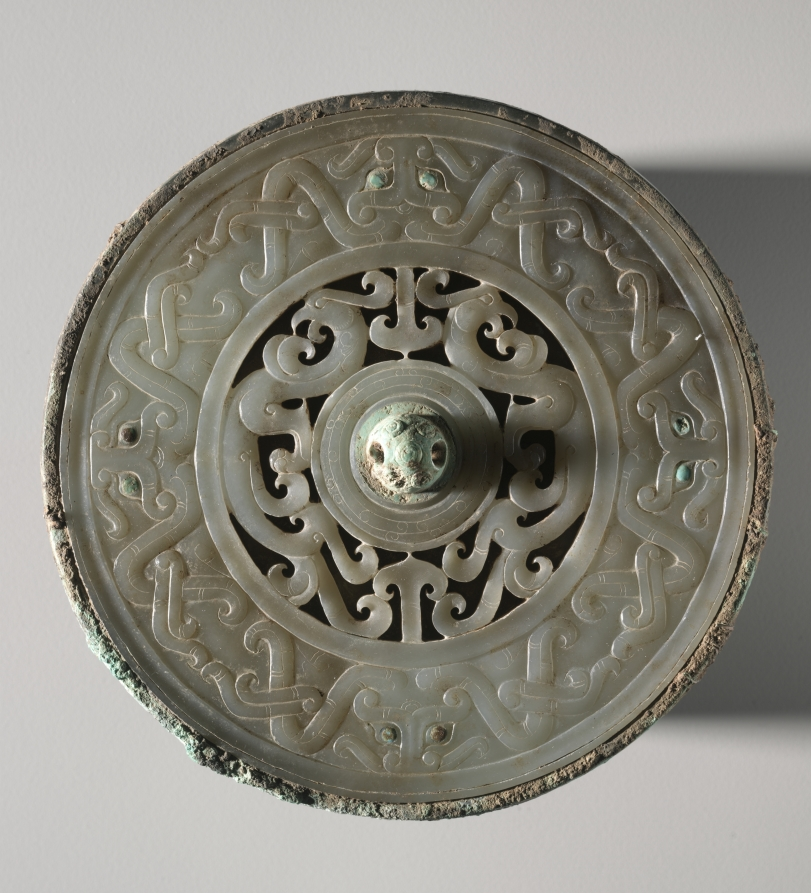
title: Mirror with Jade Disk Inset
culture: China, Eastern Zhou dynasty (770–256 BCE), Warring States period (475–221 BCE) to Western Han dynasty (206 BCE–9 CE)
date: 475 BCE–9 CE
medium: bronze with nephrite and turquoise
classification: Metalwork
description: Mirrors with a jade disk inset are perhaps the rarest of all known bronze mirrors in China. This object's conception was unquestionably aristocratic, and it was meticulously and exquisitely crafted. Aided by the skillful carving of its surface, the nephrite here exhibits a subtle luminosity. The disk features within the inner circle a pair of phoenixes and in the outer ring a set of four oxen masks having extended and interlocking horns-motifs often seen in jades of the late Warring States period and early Western Han dynasty. Consequently, this mirror has been dated to that span of time.